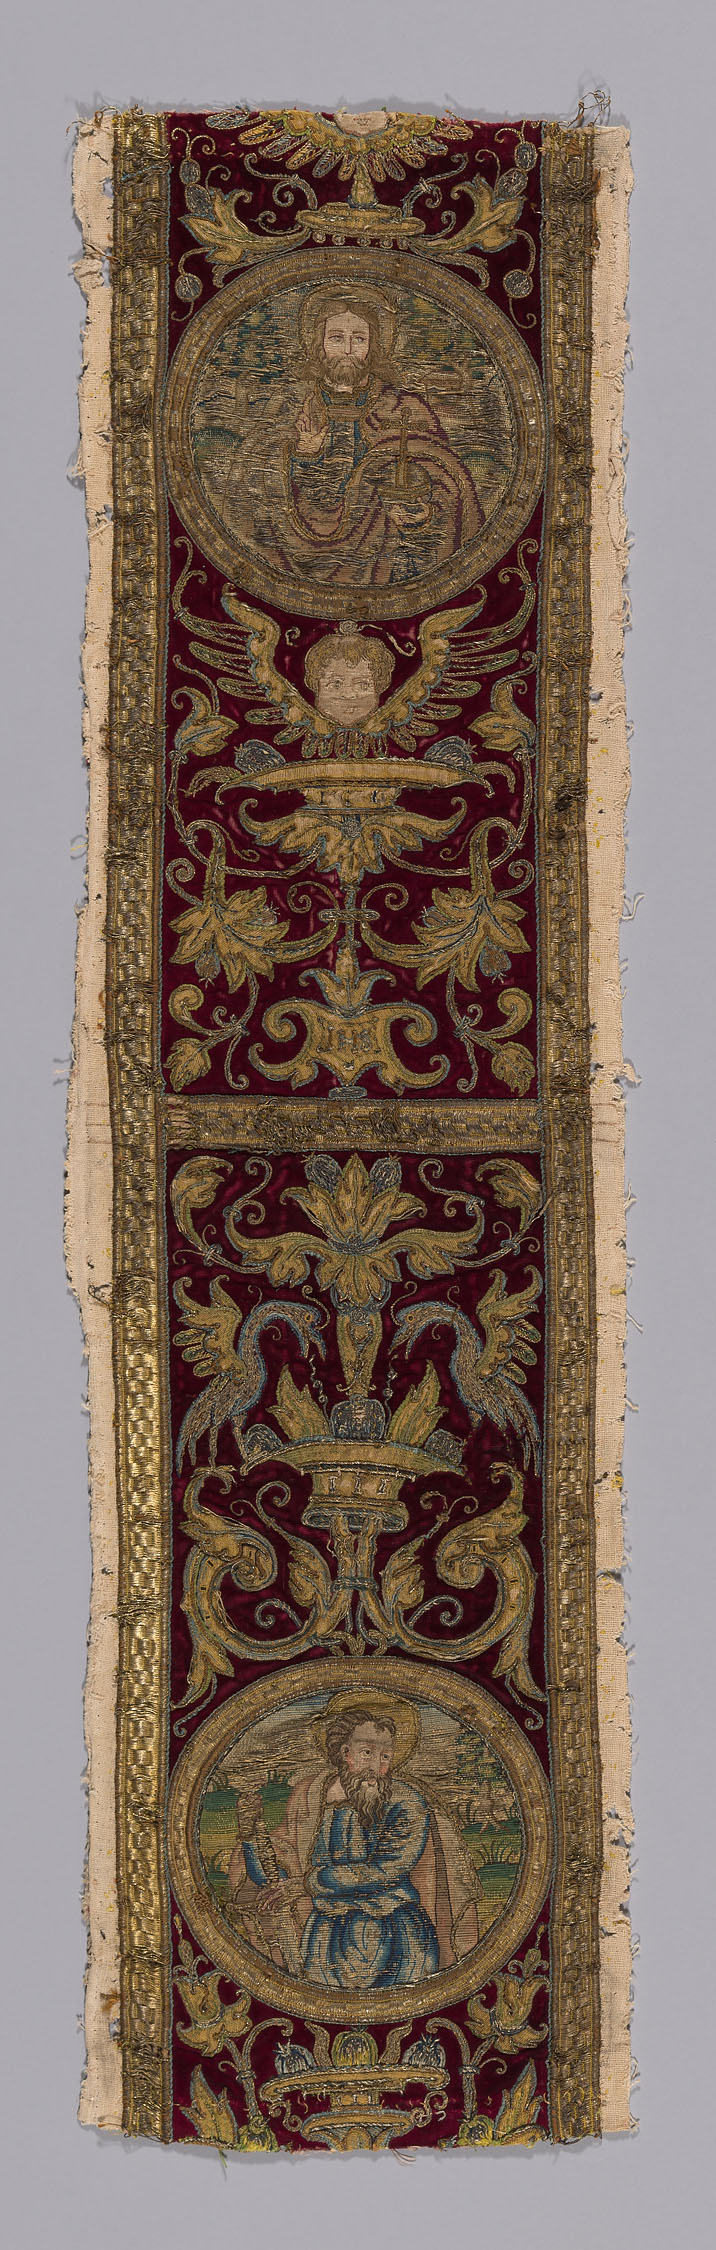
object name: Textile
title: Orphrey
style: Renaissance, european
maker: Spain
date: 16th century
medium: Velvet with design in applique and couched gold cord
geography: Spain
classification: textile; needlework (visual works); liturgical